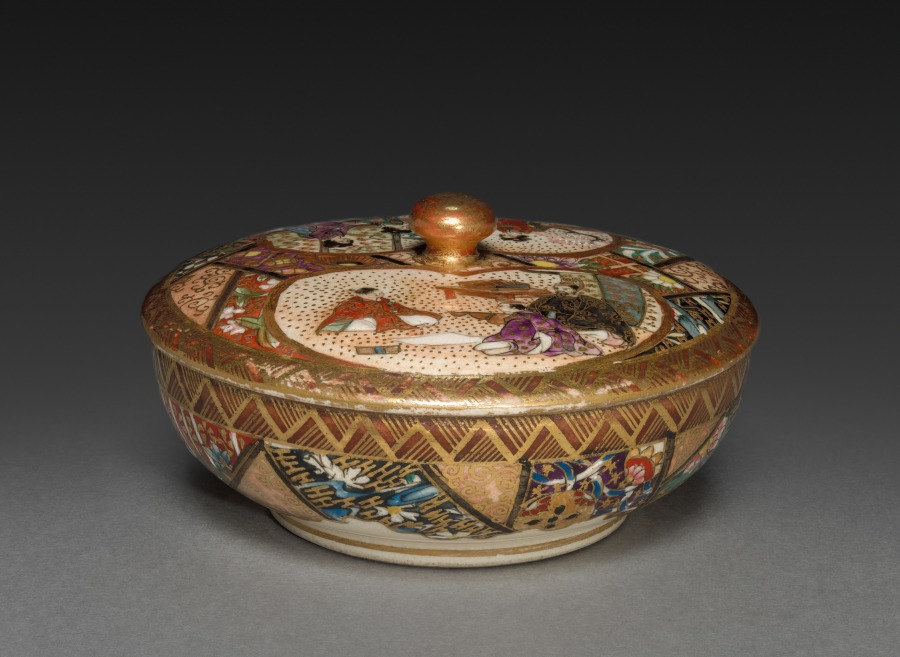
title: Covered Dish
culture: Japan, Meiji period (1868–1912)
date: early 1900s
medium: porcelain with overglaze color enamel and gold (Satsuma ware)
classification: Ceramic